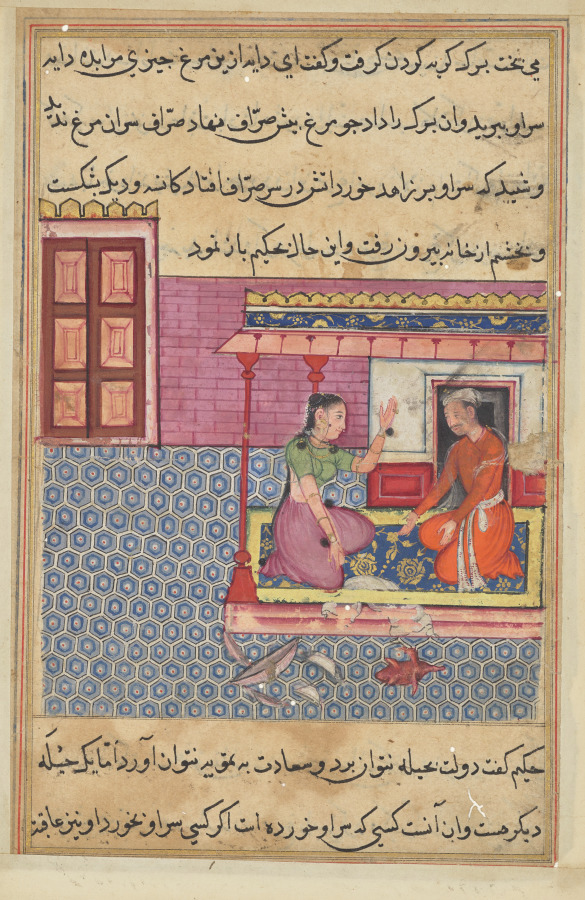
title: The pious man’s wife offers the seven-colored bird as food to her lover, but not finding its head, he breaks the pot and bowl in anger, from a Tuti-nama (Tales of a Parrot): Fifty-second Night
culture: Mughal India, court of Akbar (reigned 1556–1605)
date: c. 1560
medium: gum tempera, ink, and gold on paper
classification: Painting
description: The treacherous man knows that whoever eats the bird’s head will become a king; however, the woman’s son has already eaten it. Enraged, he demands that she cut off her son’s head and cook it for him. Maddened by love, the woman agrees. The son’s nurse learns of the woman’s terrible plan and flees with him to safety.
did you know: The cooked body of the seven-colored bird lies thrown on the tiled floor.